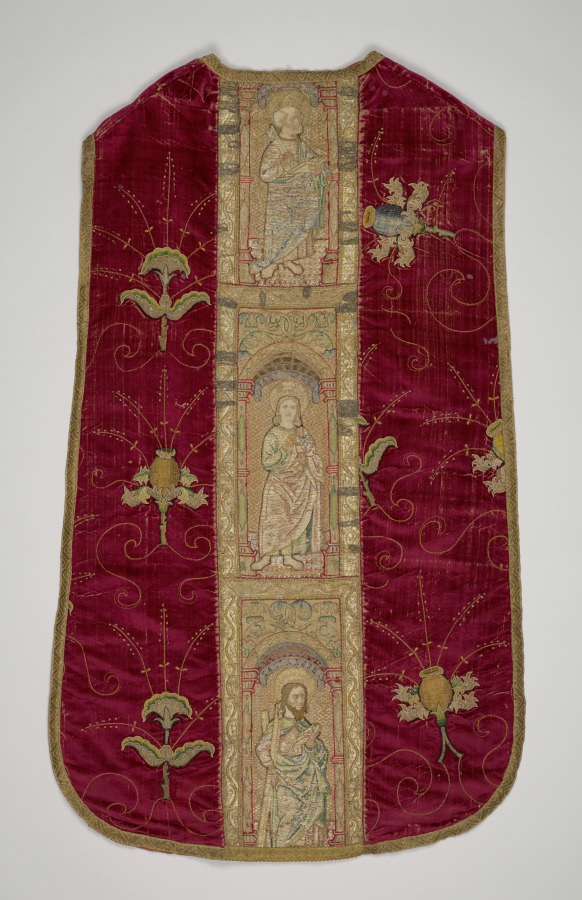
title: Chasuble with Orphrey Band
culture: England, London (embroidery) and Italy, Florence (velvet), early 16th century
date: 1500–1520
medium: Silk, gold thread, sequins; appliqué, embroidery: couching stitches Velvet: solid pile, silk; embroidery: or nué (shaded gold)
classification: Embroidery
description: The English adopted a simpler style of embroidering vestments suitable for mass production around 1500. Isolated motifs, often floral, were embroidered on plain velvet, as in this ecclesiastical chasuble. The orphrey, or embroidered band, in the center depicts Saints Peter, John the Evangelist, and Andrew, identified by their names and attributes (top to bottom). Most of the surface is covered with gold thread sewn down by silk thread passing over it in different densities to create the effect of modeling. Silk thread was also used to embroider areas of skin and hair (mostly disintegrated).